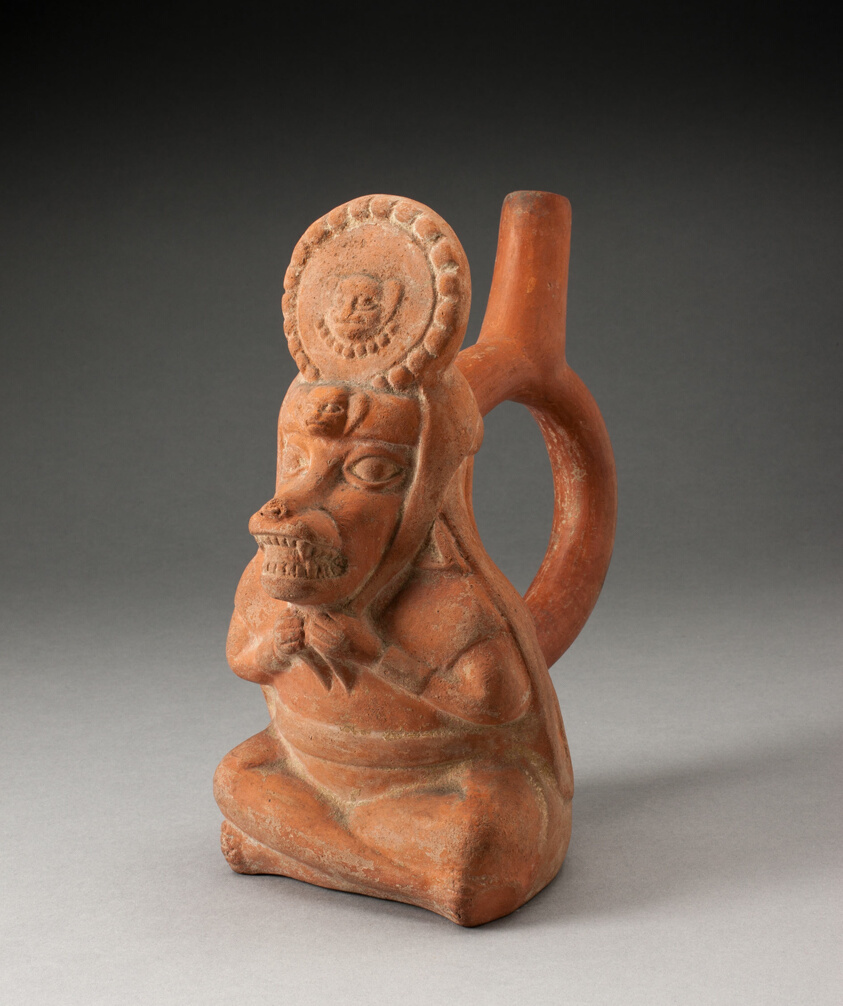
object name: Vessel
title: Handle Spout Vessel in Form of a Royal Messenger with the Head of a Fox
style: moche, Arts of the Americas, andes, south american, andean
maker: Moche (North coast, Peru)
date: 100 BCE–500 CE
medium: Ceramic and pigment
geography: Peruvian North Coast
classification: earthenware; ceramics; vessel; art of the americas